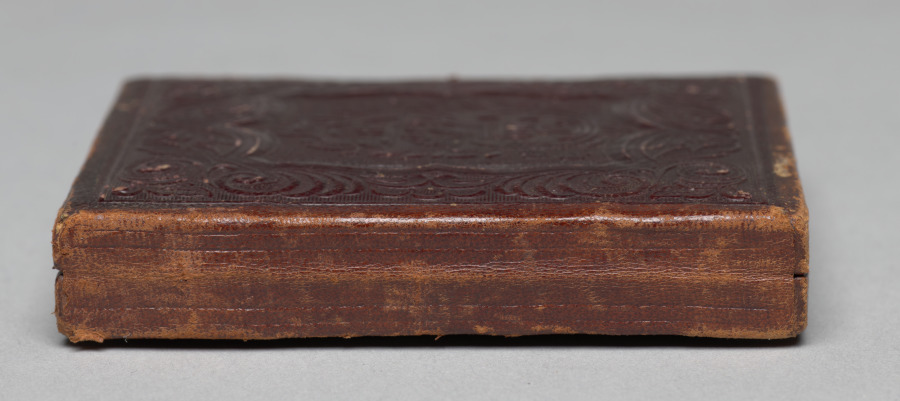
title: Mother with son with blind right eye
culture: America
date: c. 1855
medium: daguerreotype, sixth plate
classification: Photograph